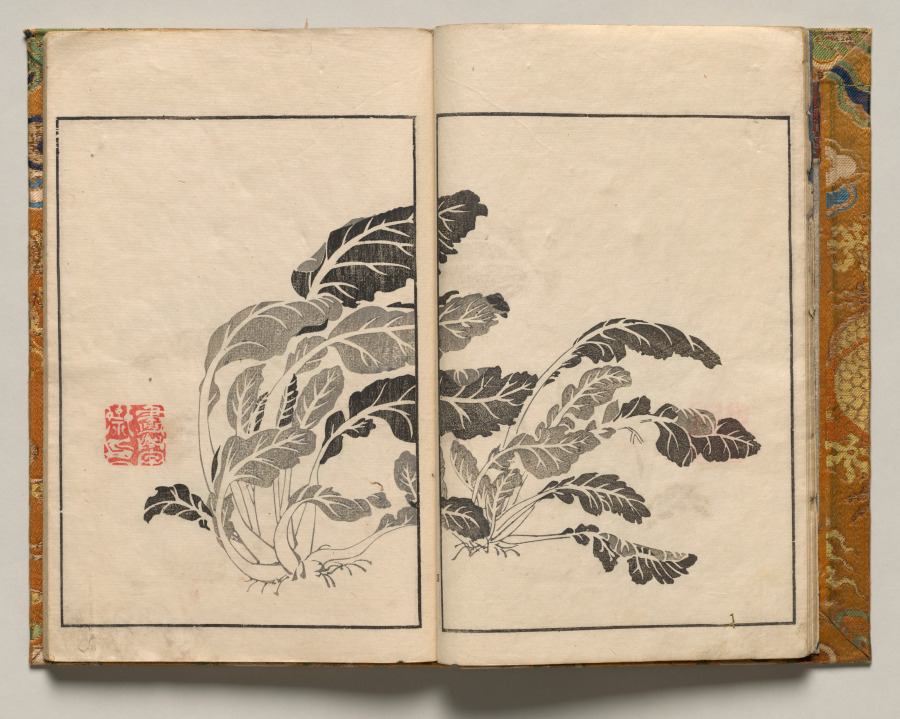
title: Bok Choy, Design Four from Shazanrō Picture Book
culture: Japan, Edo period (1615–1868)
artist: Tani Bunchō (Japanese, 1763–1841)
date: 1816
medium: Woodblock-printed book; ink and color on paper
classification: Bound Volume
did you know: Shazanrō was one of Tani Bunchō's style names.